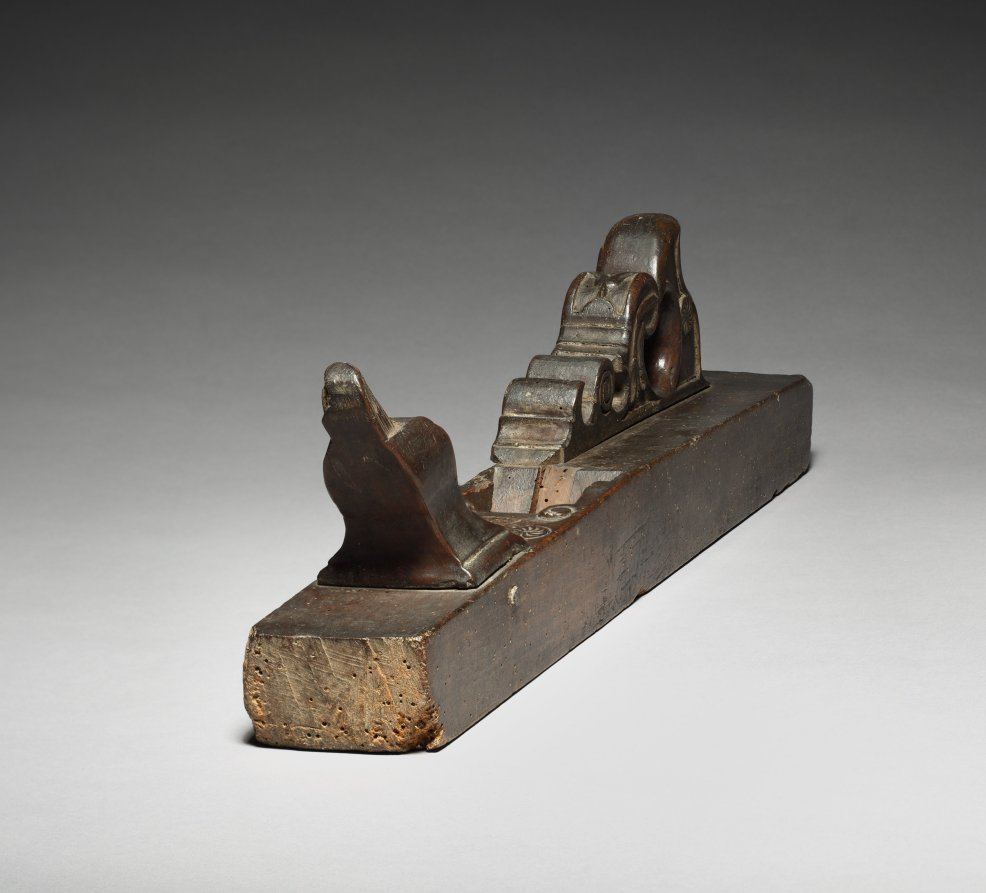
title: Carpenter's Plane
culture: Italy, early 17th century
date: early 1600s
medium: wood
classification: Tool